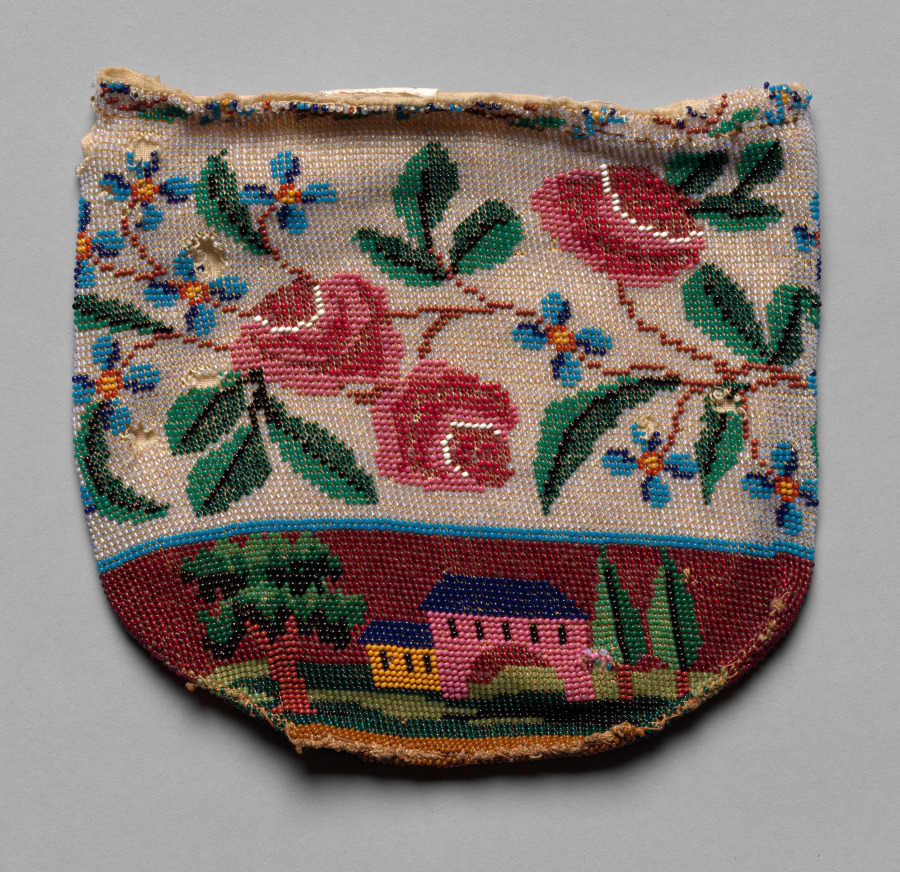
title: Beaded Bag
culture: America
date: 1800s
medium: glass beads; plain weave cotton or linen lining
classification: Garment